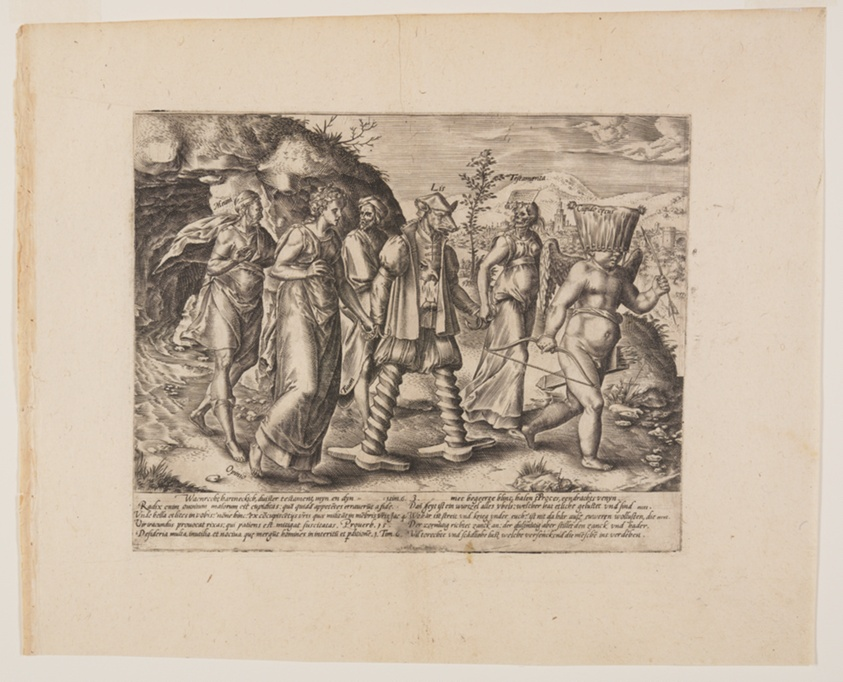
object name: Print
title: Avarice is the Root of all Evil, from Litis Abusus (The Abuses of the Law)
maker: Hendrick Goltzius (Dutch, 1558–1617)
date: c. 1576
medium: Engraving on ivory laid paper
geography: Netherlands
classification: print; paper; prints and drawing; engraving